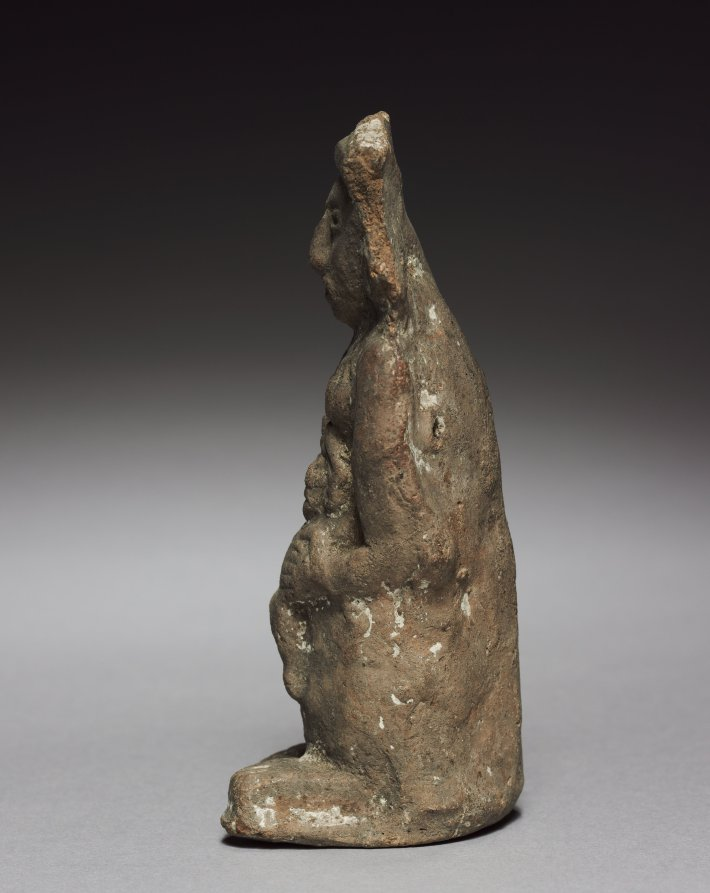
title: Figurine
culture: Mexico, Aztec, 14th century-16th century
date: 1325–1521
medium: terracotta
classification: Ceramic